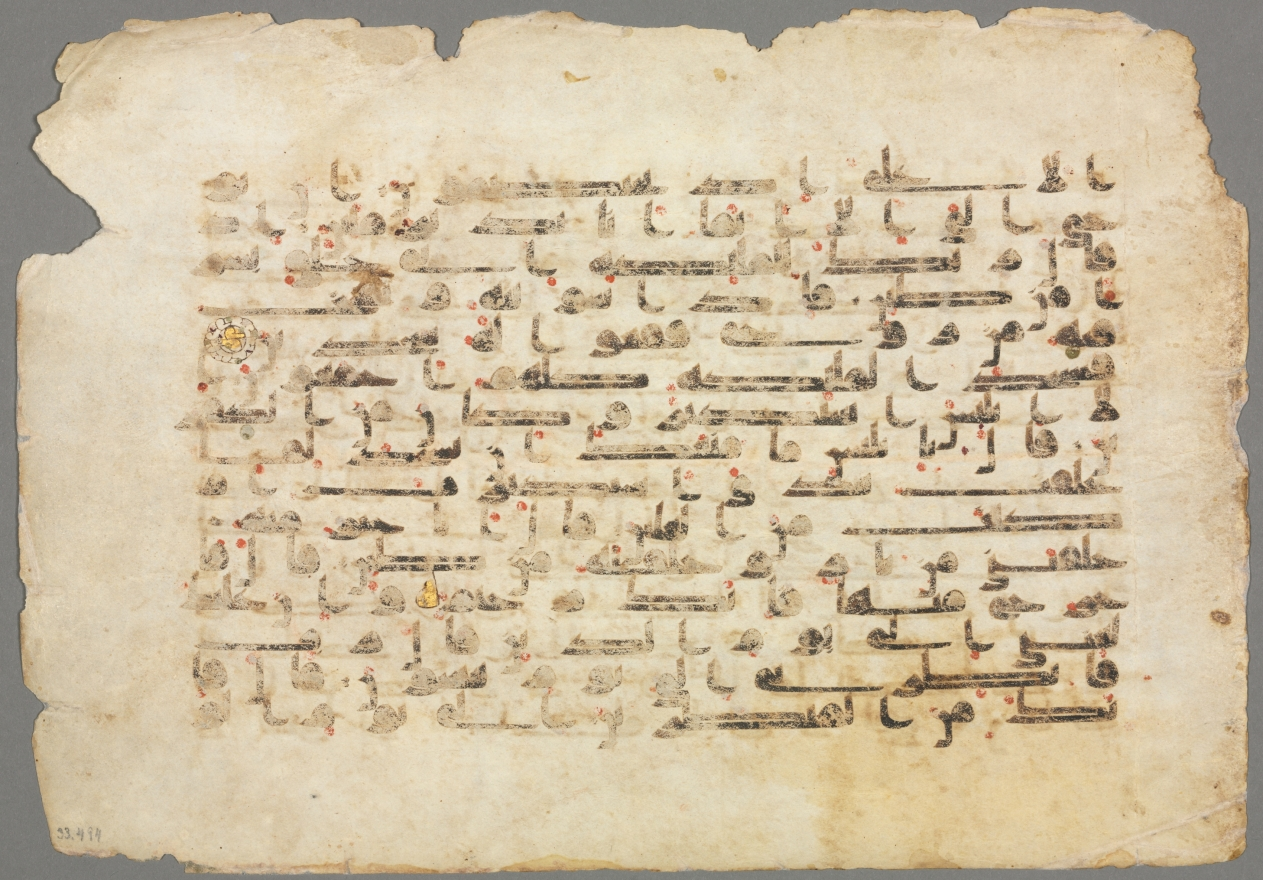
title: Qur'an Manuscript Folio (verso)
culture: Iran or Iraq, Abbasid period, 9th–10th century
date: 800s–900s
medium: ink, gold, and color on parchment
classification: Calligraphy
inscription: Kufi script. Text: XXXVIII:81–88, XXXIX:1–3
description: This page features the last eight verses of the Sura al-Sad (named for the Arabic letter sad) and the opening verses of the Sura al-Zumar (the Companies). The latter begins: The sending down of the Book is from God the All-mighty, the All-wise. We have sent down to thee the Book with the truth; so worship God, making thy religion His sincerely.